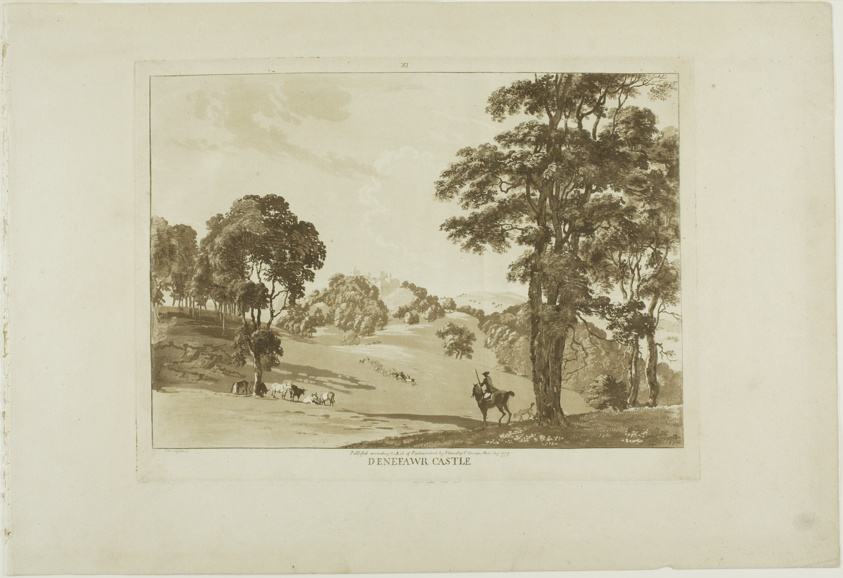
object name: Print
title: Denefawr Castle, plate eleven from Twelve Views in Wales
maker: Paul Sandby (English, 1731-1809)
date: 1777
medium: Aquatint on cream laid paper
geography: England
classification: aquatint; print; prints and drawing